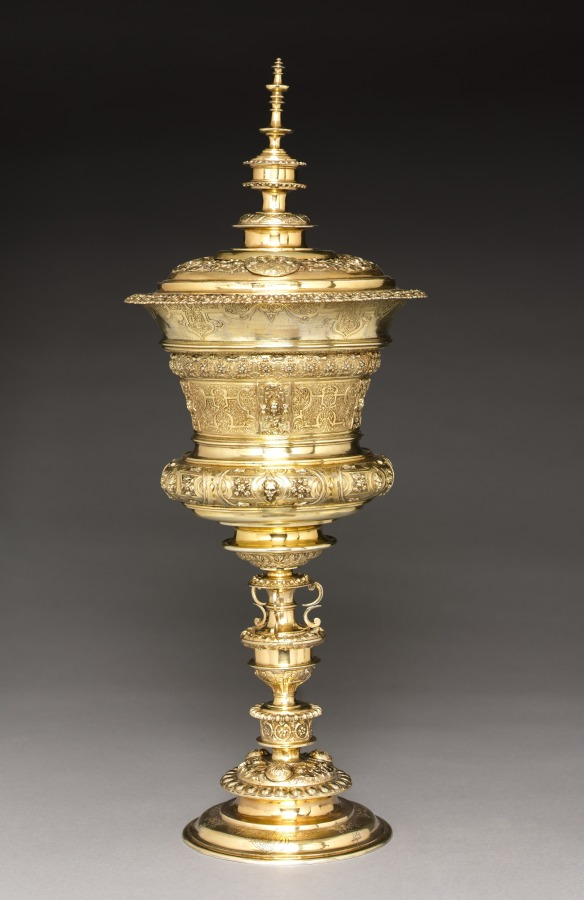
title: Standing Cup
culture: Germany, Nuremberg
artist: after a design by Virgil Solis (German, 1514–1562)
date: mid- to late 1500s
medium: gilt silver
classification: Metalwork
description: Large ceremonial silver cups with covers were a status symbol in the late 16th century, particularly when gilded like this superb example from Nuremberg. Stylish and grand, these cups provided the ultimate vessel from which a royal guest or aristocratic visitor could drink at a formal banquet. They came to be known as willkom, or welcome cups, as a result. The lid, mid-section, and base are all cast in sections, creating imposing height and stability for the great amount of silver used, a testament to the skill of the maker and the pocketbook of the owner.